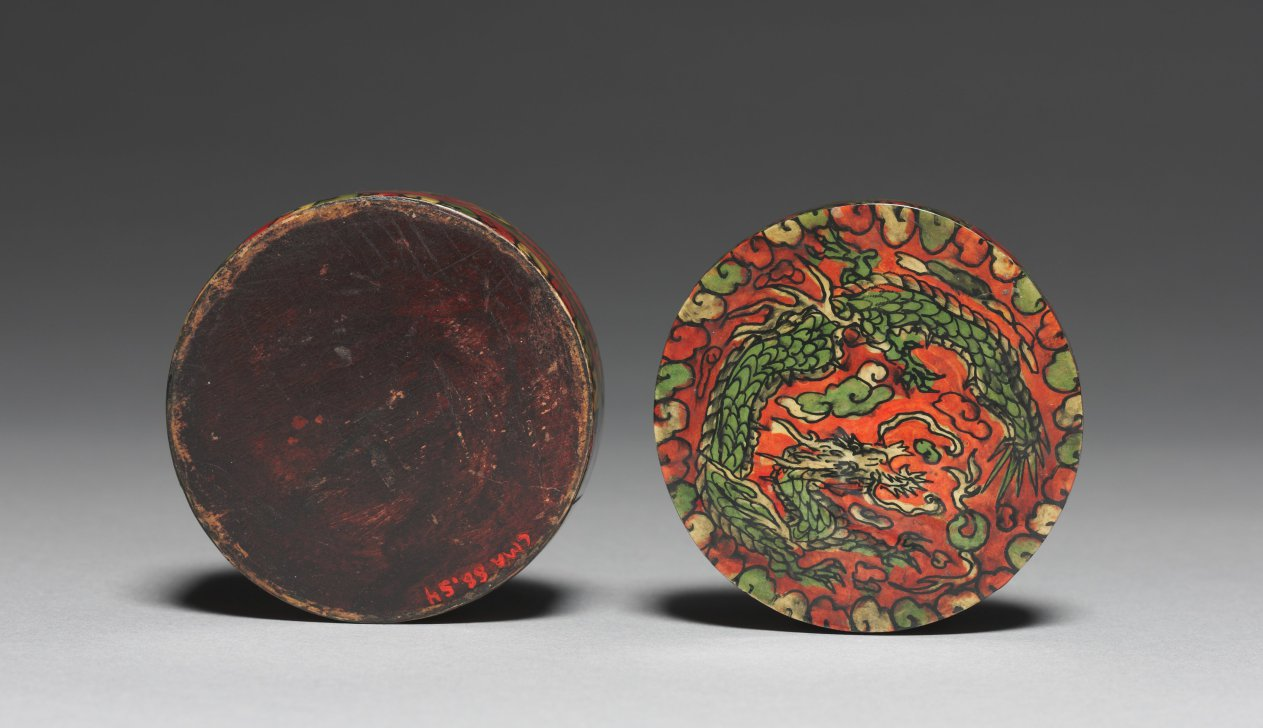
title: Incense Box with Dragon Design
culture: Korea, Joseon dynasty (1392–1910)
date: 1900s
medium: Painted wood with flattened ox-horn inlay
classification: Miscellaneous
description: This incense box is colorfully decorated with the technique of oxhorn plating. The oxhorn was cut, soaked in water, boiled, and then pressed into thin translucent sheets. Since oxhorns are usually rather small, dozens of them were required to fully decorate even a small wooden object. The lid of this container is colorfully illustrated with the imagery of a dragon amid clouds deemed as an auspicious symbol, and its side presents flying dragon and phoenix following one after another.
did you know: This box is made of small flattened pieces of oxhorn. Since oxhorn is rather small, possibly dozens of them were used to fully decorate even a small wooden object like this box.